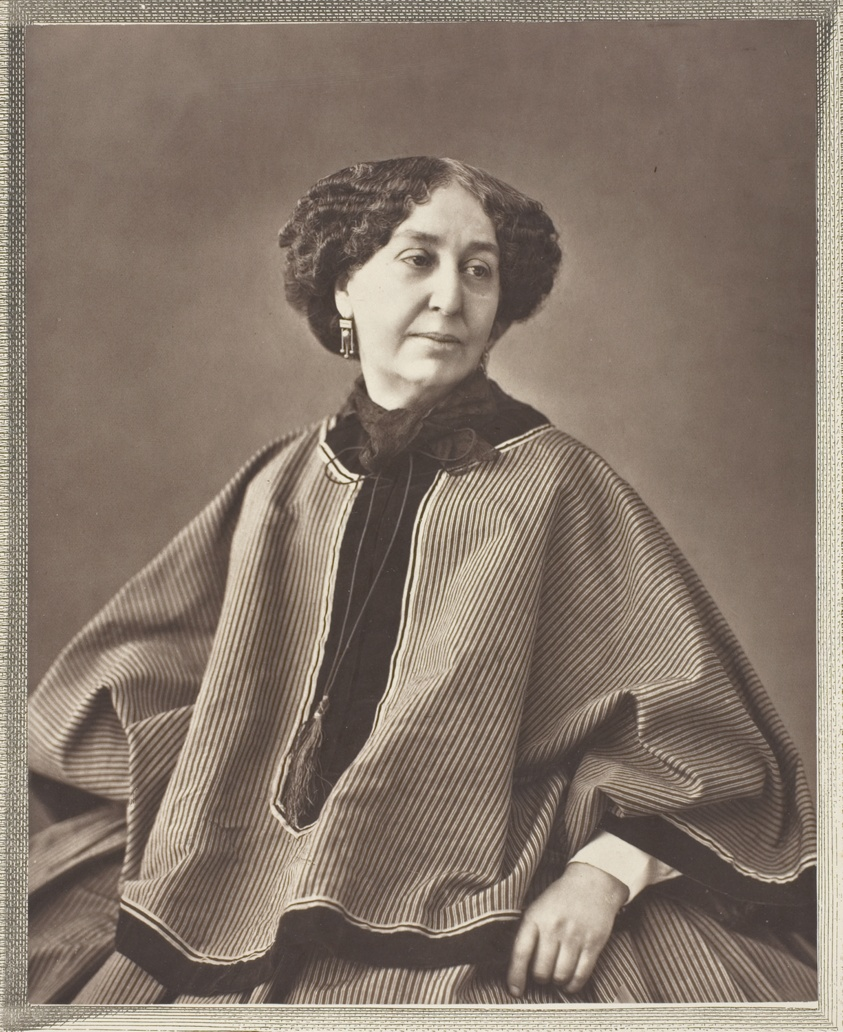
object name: Photograph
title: George Sand (born Amantine Lucile Aurore Dupin, French novelist, 1804-1876)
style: 19th century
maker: Nadar (Gaspard Félix Tournachon) (French, 1820–1910)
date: 1864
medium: Woodburytype, from the periodical “Galerie Contemporaine Littéraire, Artistique” (1877), volume 2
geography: France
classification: woodburytype; photomechanical process; photography; photograph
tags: Collected by Hugh Edwards, Contemporaine Littéraire